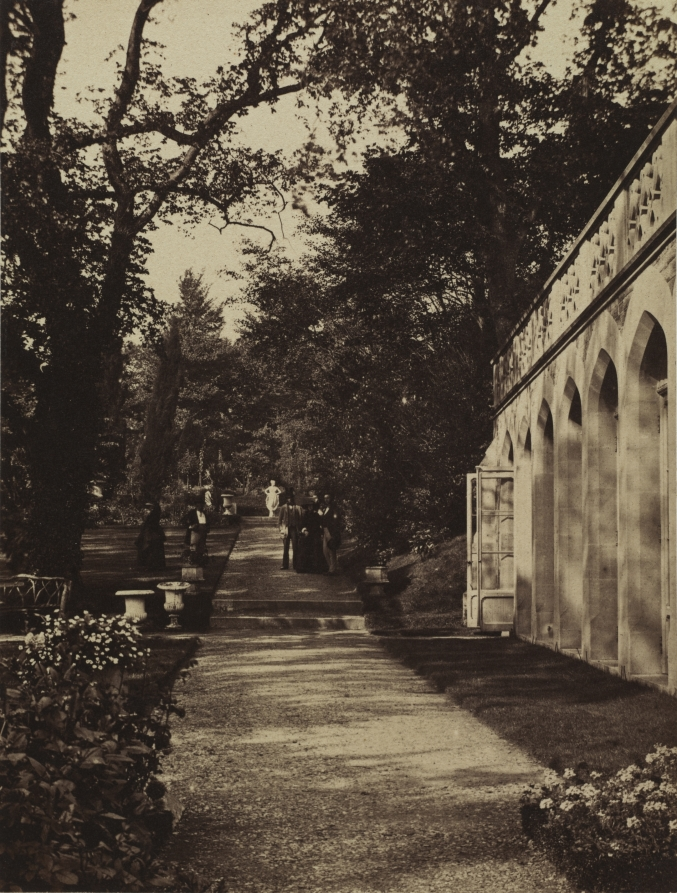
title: Orangery and Flower Garden at Singleton, Glamorganshire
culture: England, 19th century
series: Photographic Album for the Year 1855, Being Contributions from the Members of the Photographic Club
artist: W. Graham Vivian (British, 1827–1912)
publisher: Photographic Exchange Club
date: 1854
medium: albumen print from wet collodion negative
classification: Photograph